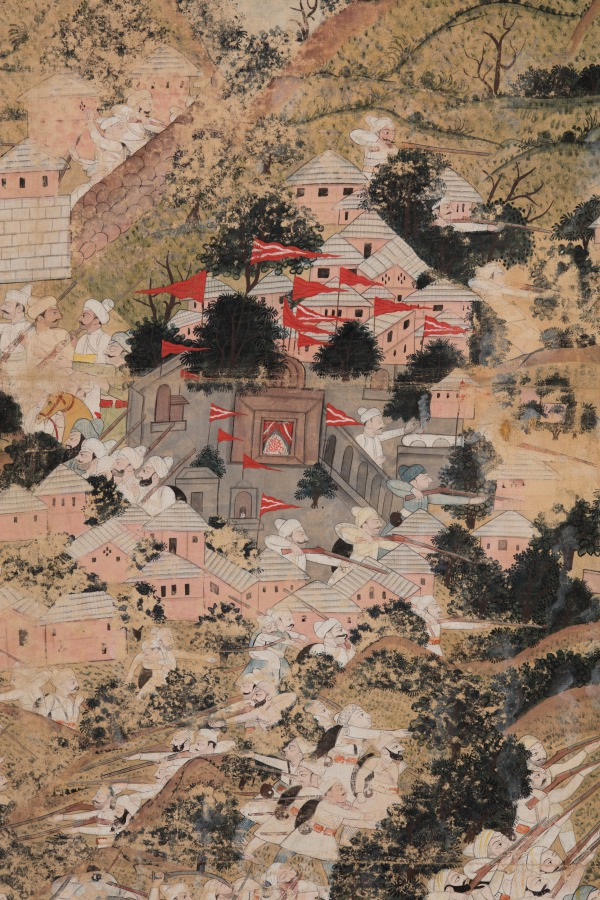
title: Raja Sansar Chand attacking Kangra Fort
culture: Northern India, Pahari kingdom of Kangra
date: after 1782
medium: Gum tempera, ink, and gold on cotton cloth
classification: Painting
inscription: Inscriptions in Takri and Persian. Persian reads: “On the 23rd of the month of Kartik, Samvat 1839 (1782 AD) Sri Maharaja Sansar Chand Bahadur attached Lakkarkot (Nagrakot ?) and the fortress of Kangra, attained victory and made siege intrenchments at the fortress of Kot Kangra.”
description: In 1782, the 17-year-old king of Kangra fought to retake his ancestral kingdom from the Mughals, who had controlled the territory since 1620. He rides a dark brown horse in front of the camel at the far right, blending in among his army and allies. The leftmost panel shows the residents of Kangra fleeing the conflict with their belongings on their heads to the safety of the fortress at the far left, from the walls where cannons are being fired. The main temple, built of gray stone, is in the middle of the composition, marked by red flags.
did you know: The king is 17 years old, beardless, riding a dark brown steed in front of the camel at the far right.